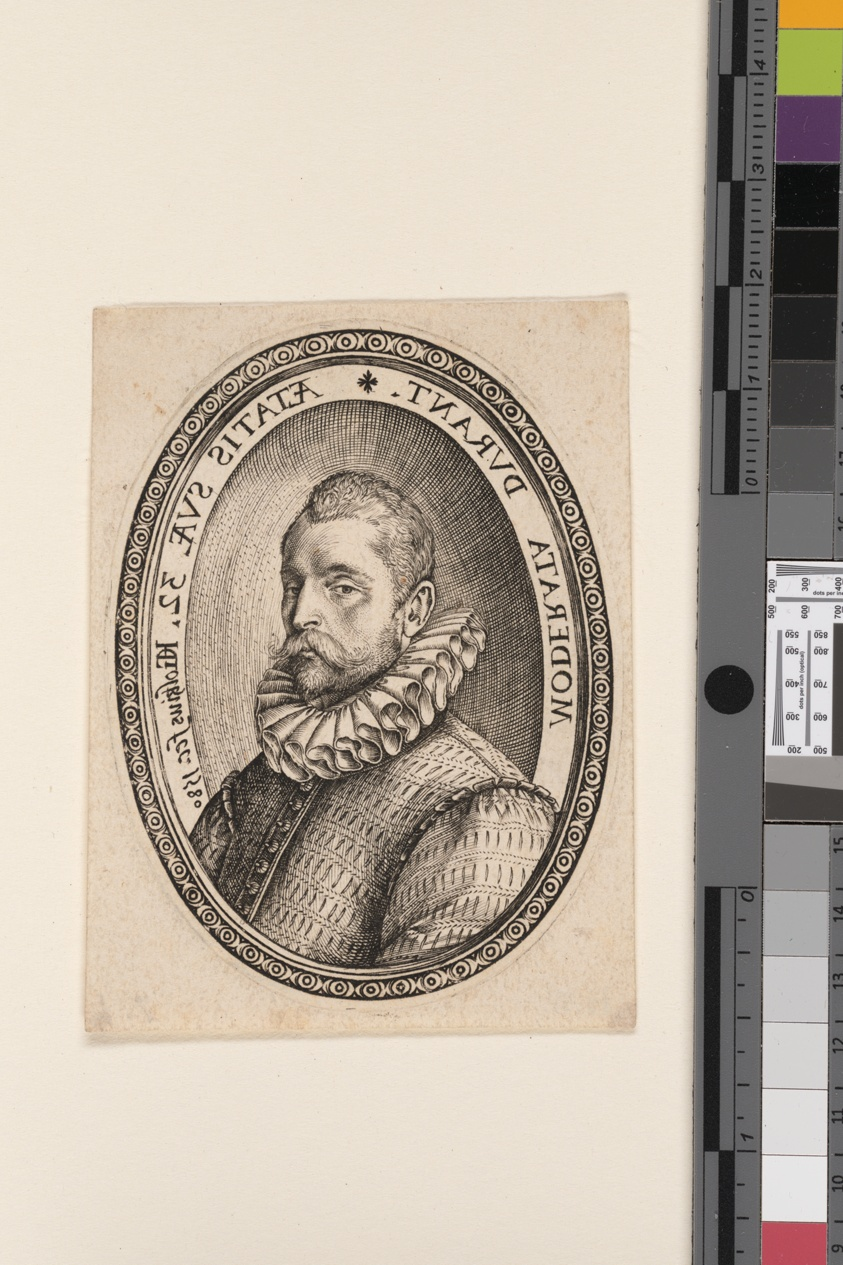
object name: Print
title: Bust of a Man Facing Left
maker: Hendrick Goltzius (Dutch, 1558–1617)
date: 1580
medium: Engraving on paper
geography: Netherlands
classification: engraving; paper; print; prints and drawing